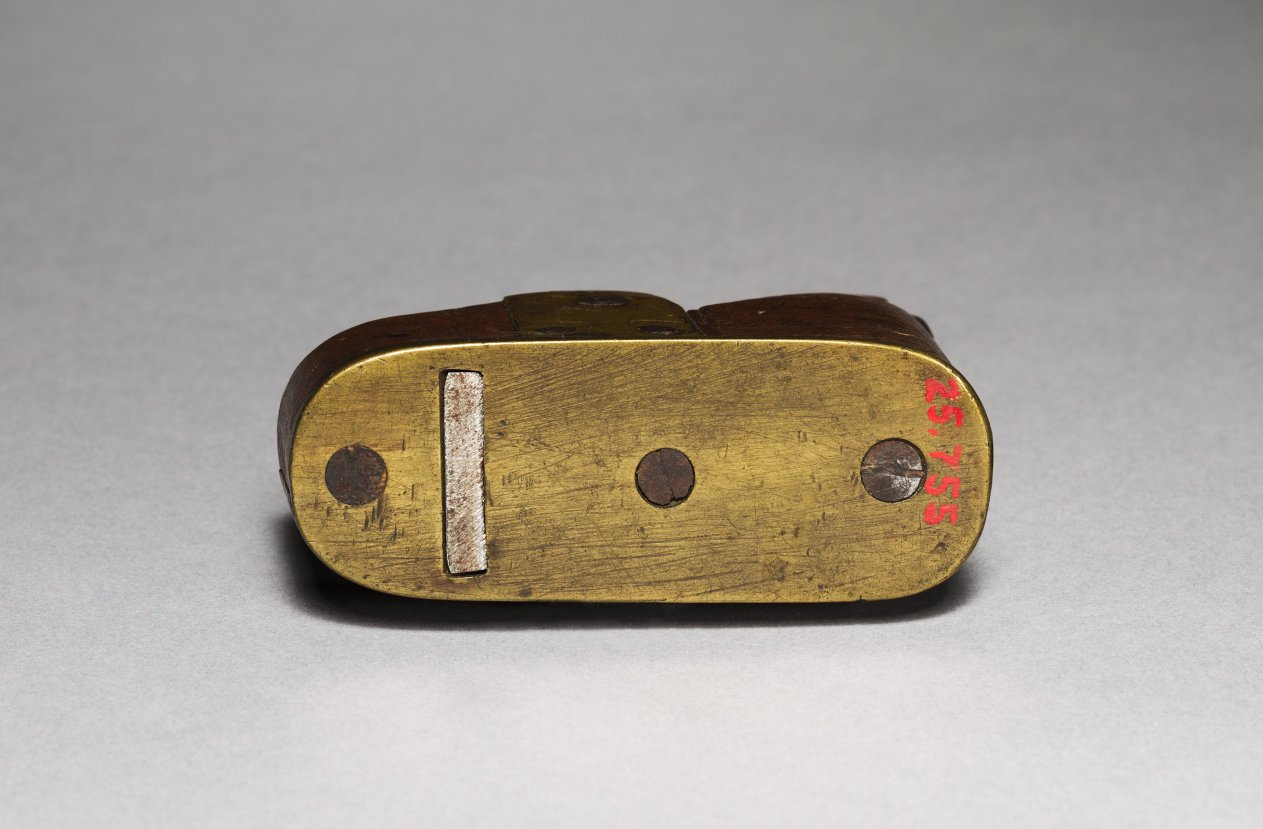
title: Plane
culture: Europe, 18th century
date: 1700s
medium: wood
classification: Tool